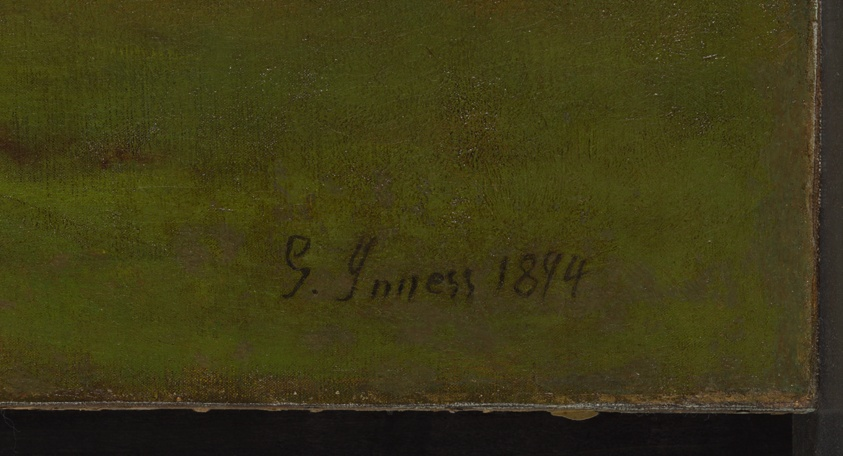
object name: Painting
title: Harvest, Montclair, New Jersey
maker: George Inness (American, 1825–1894)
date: 1884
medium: Oil on canvas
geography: United States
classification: painting; american arts